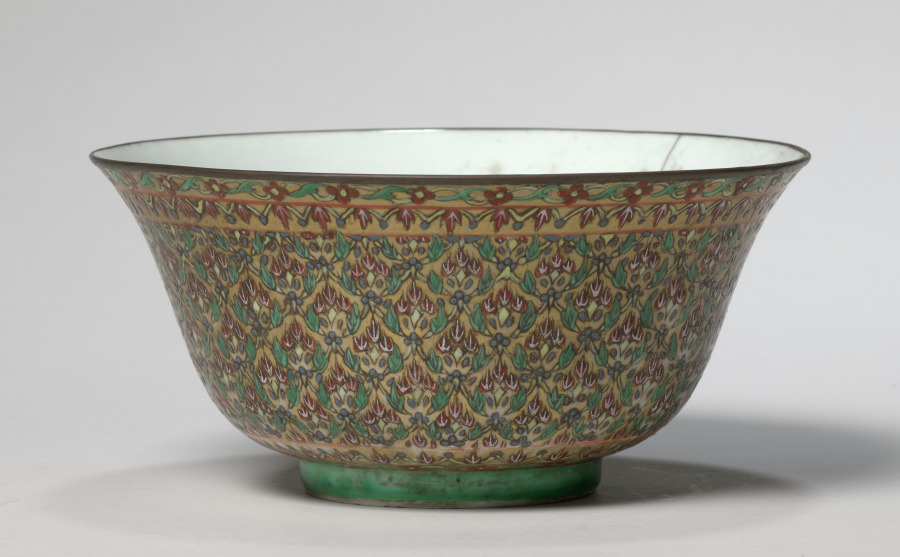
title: Chow Bowl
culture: Siam, 18th century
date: 1700s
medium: porcelain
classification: Metalwork